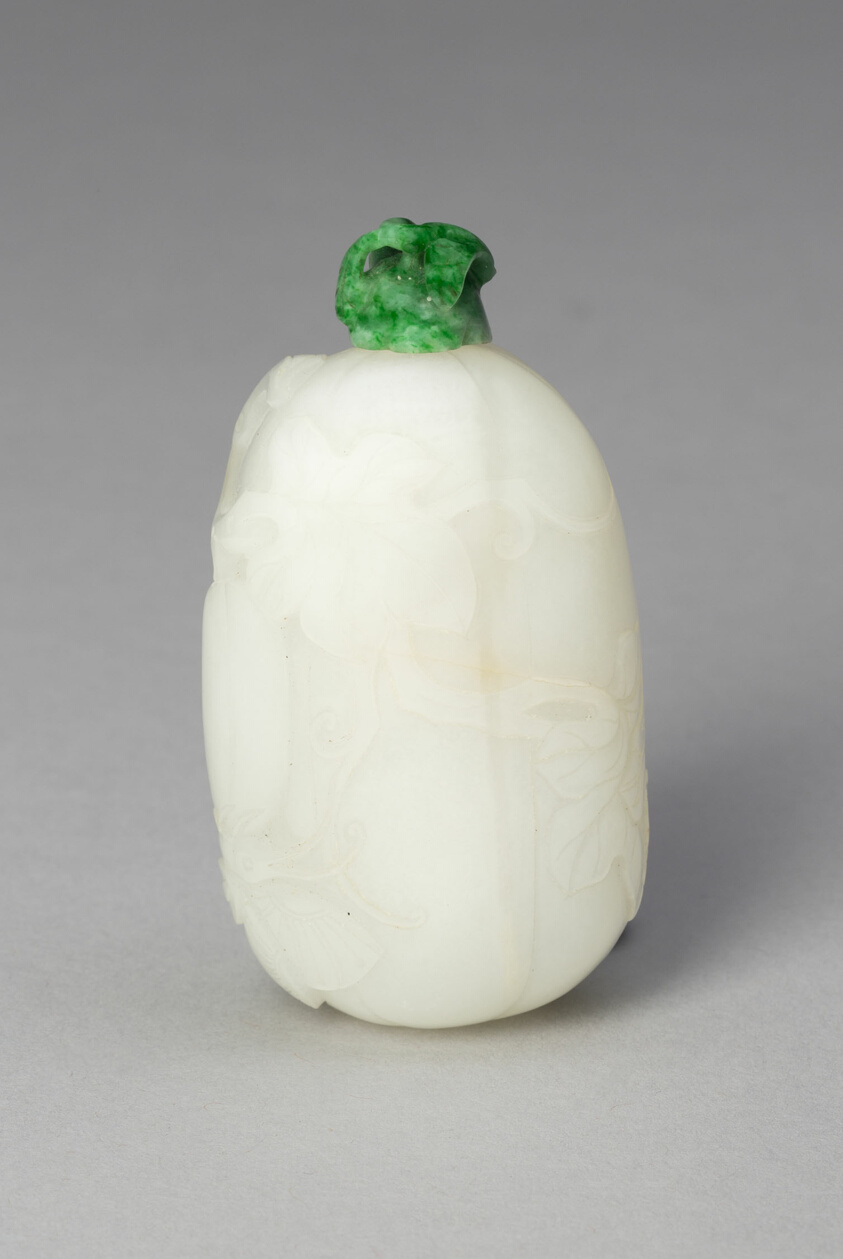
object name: Vessel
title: Melon-Shaped Snuff Bottle with Trailing Leaves and a Butterfly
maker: China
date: Qing dynasty (1644–1911), 1740–1800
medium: White nephrite with carved decoration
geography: China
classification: snuff bottle; stone; asian art; vessel